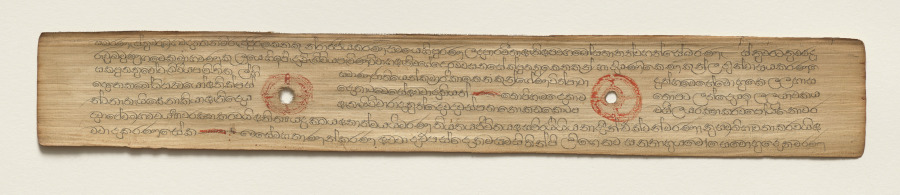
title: Leaf from a Buddhist Manuscript (verso)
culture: Sri Lanka, Singhalese, Late 17th century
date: c. 1700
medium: fiber paper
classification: Manuscript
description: Palm leaf material is still used for manuscripts in Sri Lanka. The palm leaves are prepared first by boiling them, drying them in the sun, and then rubbing them with oils. Scribes then use a metal stylus to incise the text. Then charcoal powder is wiped across the pages, filling in only the inscribed lines.